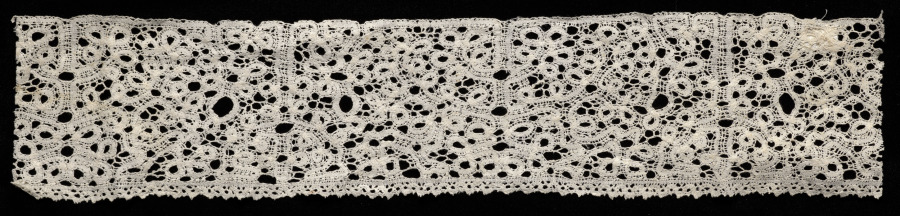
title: Lace Edging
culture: Italy, Milan ?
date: 1700s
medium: Linen: bobbin lace (tape lace with bride ground)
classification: Lace